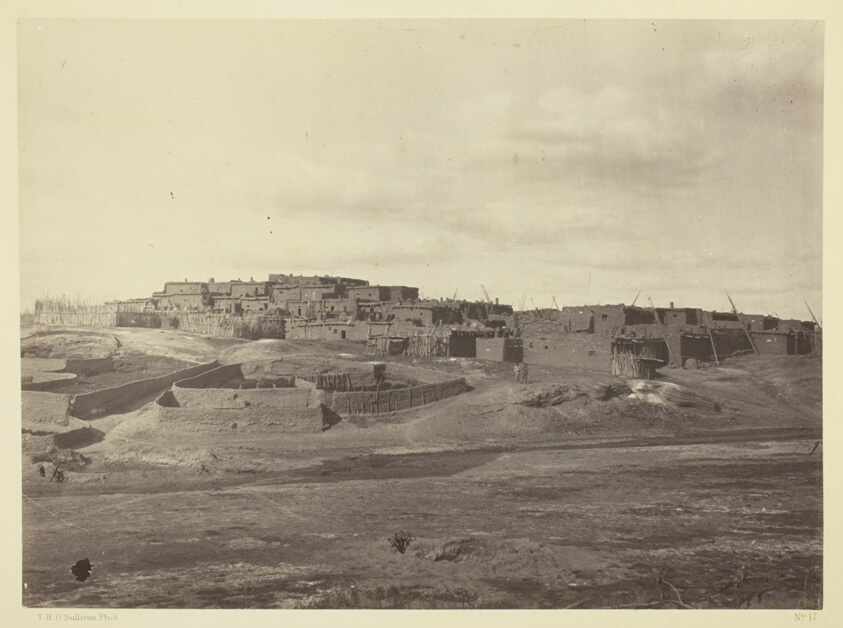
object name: Photograph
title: Indian Pueblo, Zuni, N.M. View from the South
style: 19th century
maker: Timothy O'Sullivan (American, born Ireland, 1840–1882)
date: 1873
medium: Albumen print, from the album "Geographical & Geological Explorations & Surveys West of the 100th Meridian," vol. 2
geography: United States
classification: albumen print from collodion negative; photograph; photography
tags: Collected by Hugh Edwards